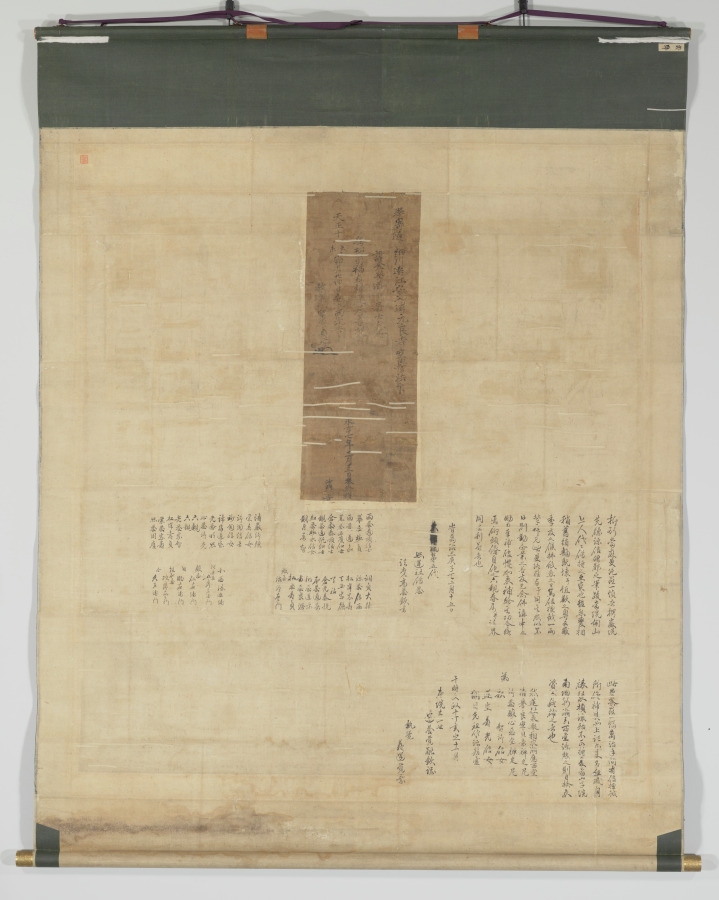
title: Taima Mandala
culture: Japan, Kamakura period (1185–1333)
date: early 1300s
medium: hanging scroll; ink, color, and gold on silk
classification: Painting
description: This painting is a copy after an 8th-century woven mandala belonging to the temple Taimadera. The composition is based on a sacred text that describes the Buddha Shakyamuni’s explanation of Amida’s Pure Land to Queen Vaidehi, as well as his instructions to her on visual meditation upon the Pure Land. The Pure Land appears at the center of the painting. To the left is the story of Queen Vaidehi’s encounter with Shakyamuni, and to the right are the scenes she is given to visualize. The bottom illustrates the nine levels of birth that can be attained in the Pure Land.